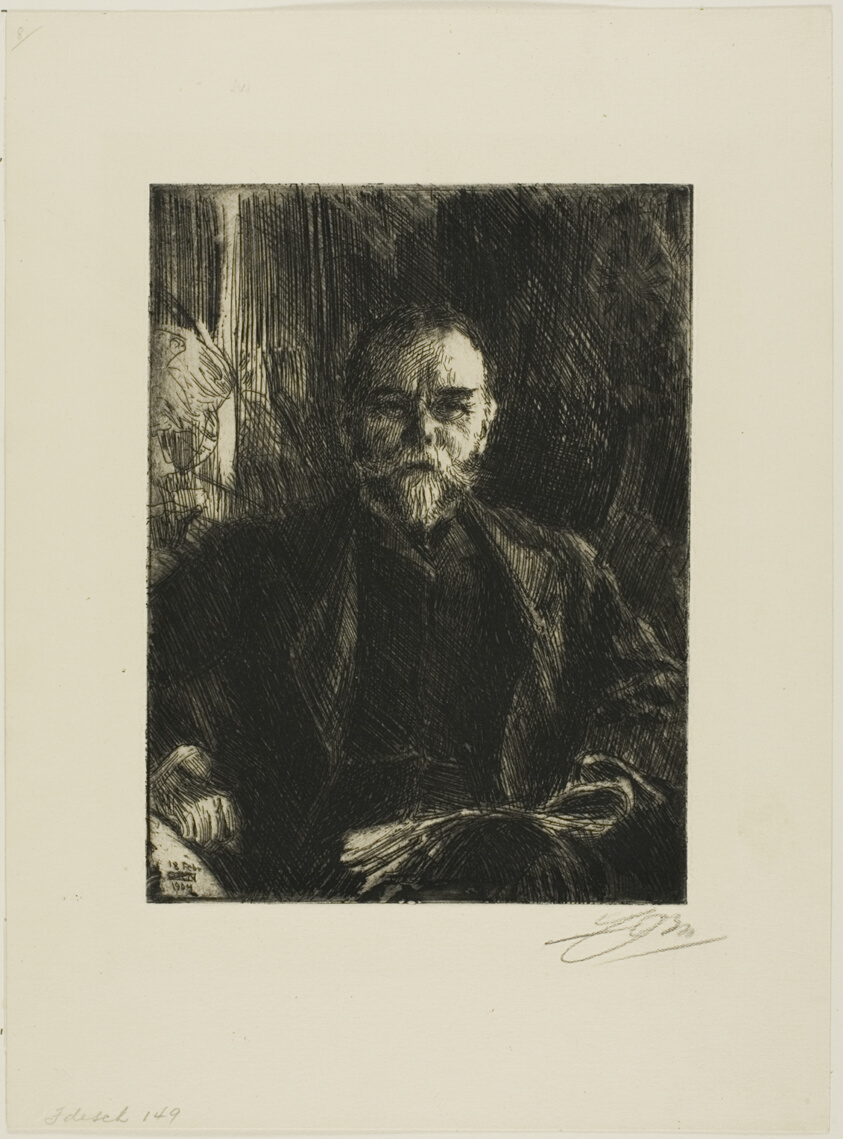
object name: Print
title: John Hay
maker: Anders Zorn (Swedish, 1860-1920)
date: 1904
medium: Etching on ivory laid paper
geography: Sweden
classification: etching; print; prints and drawing